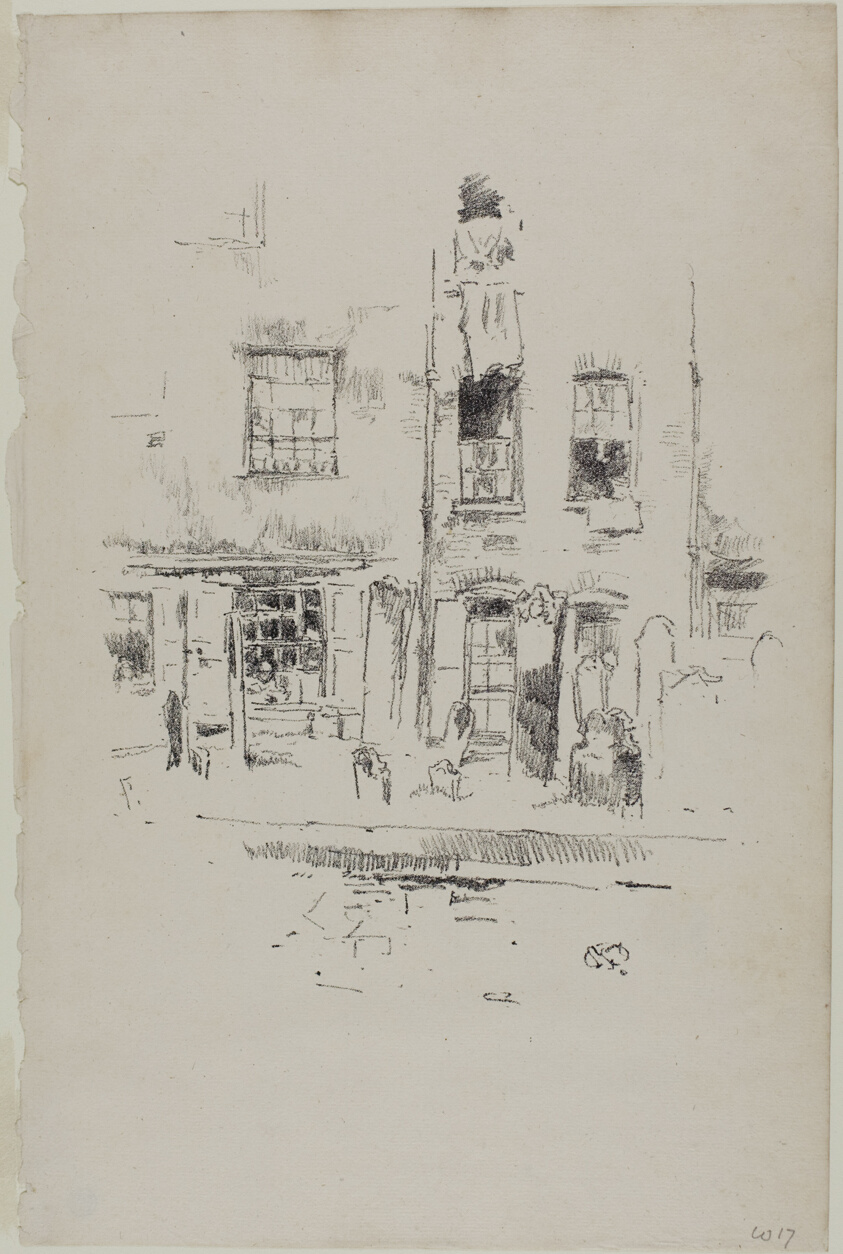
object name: Print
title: Churchyard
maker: James McNeill Whistler (American, 1834-1903)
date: 1887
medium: Transfer lithograph in black on cream laid paper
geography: United States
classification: transfer lithograph; lithograph; print; prints and drawing; paper